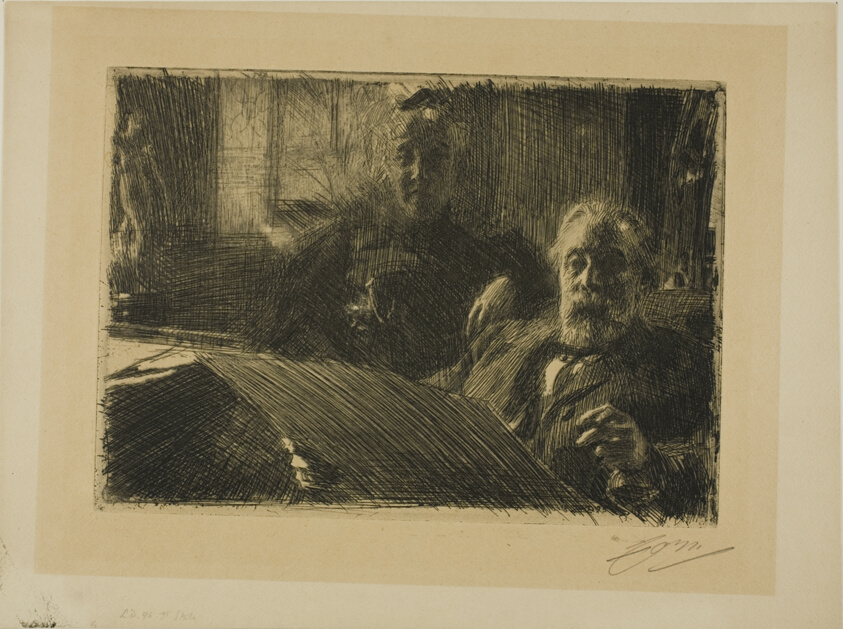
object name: Print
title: Mr. and Mrs. Fürstenberg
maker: Anders Zorn (Swedish, 1860-1920)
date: 1895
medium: Etching on tan wove paper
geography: Sweden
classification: etching; print; prints and drawing